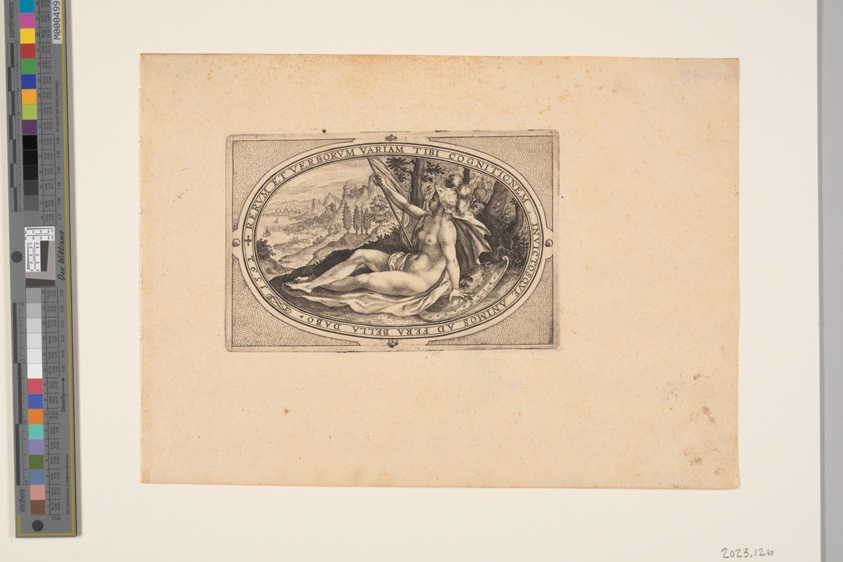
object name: Print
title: Minerva, from Gods and Goddesses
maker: Crispijn van de Passe I; Dutch, c. 1565–1637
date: 1592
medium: Engraving on paper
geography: Netherlands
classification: engraving; paper; print; prints and drawing